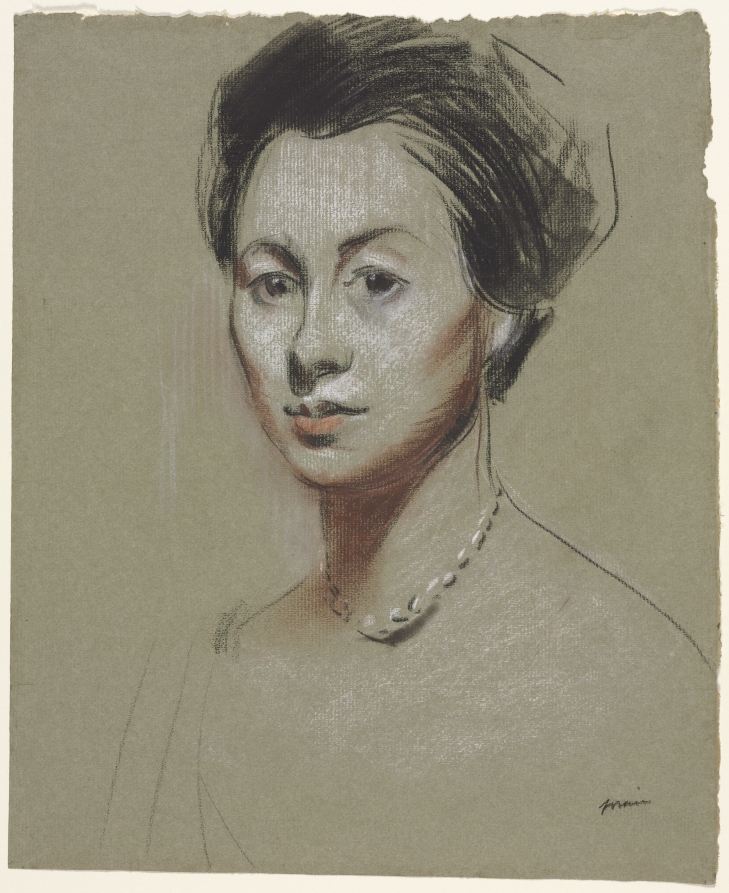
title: Ava Mendelsohn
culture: France, late 18th-early 19th Century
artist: Jean Louis Forain (French, 1852–1931)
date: fourth quarter 1800s or first third 1900s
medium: pastel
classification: Drawing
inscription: signed, lower right, in black chalk: forain